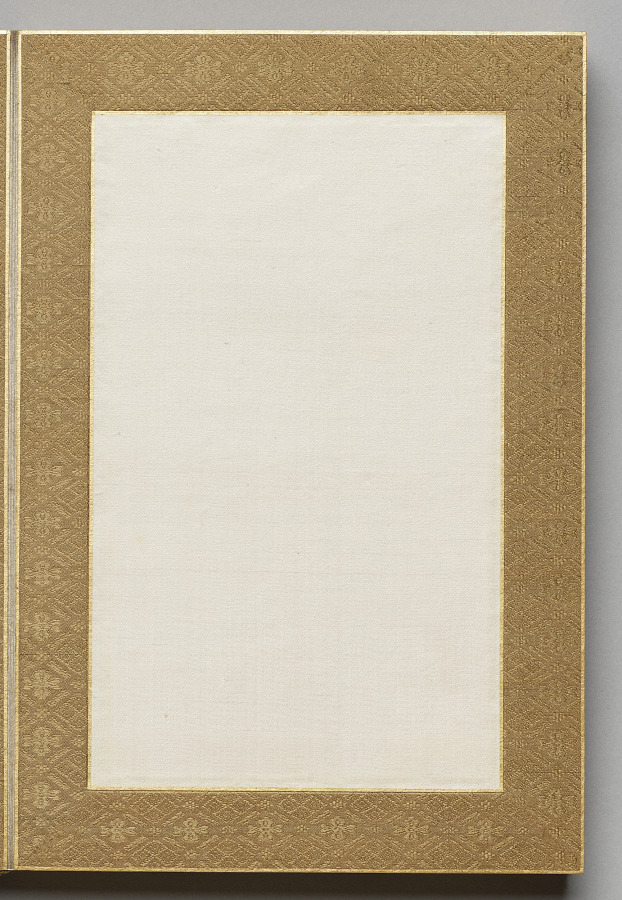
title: Painting from Flowers and Grasses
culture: Japan, Edo period (1615–1868)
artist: Tsubaki Chinzan (Japanese, 1801–1854)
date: 1841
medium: album; ink and color on silk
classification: Painting